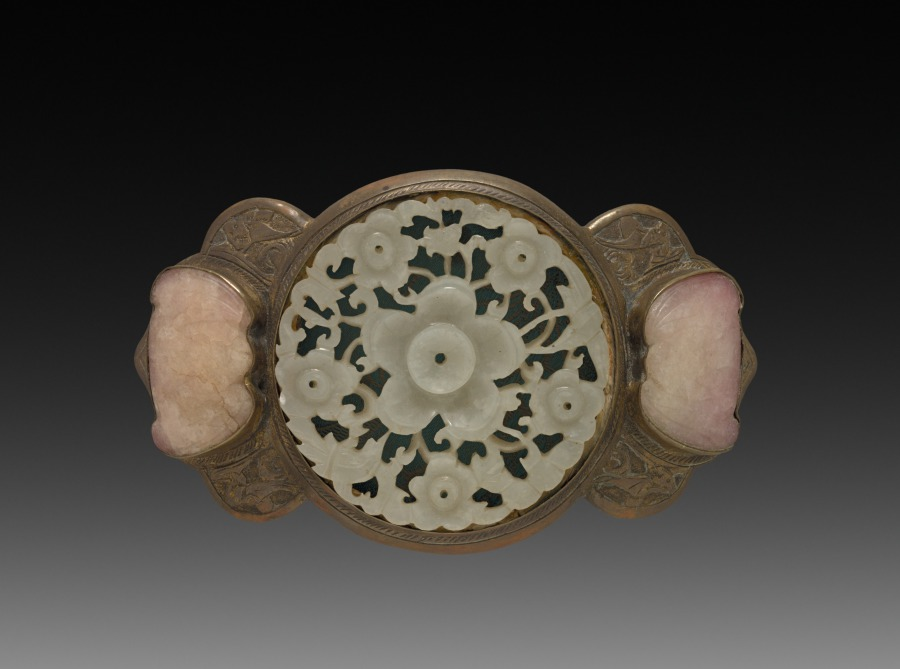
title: Buckle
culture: China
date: 1900s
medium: brass, engraved and set with white jade and rose quartz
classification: Jewelry